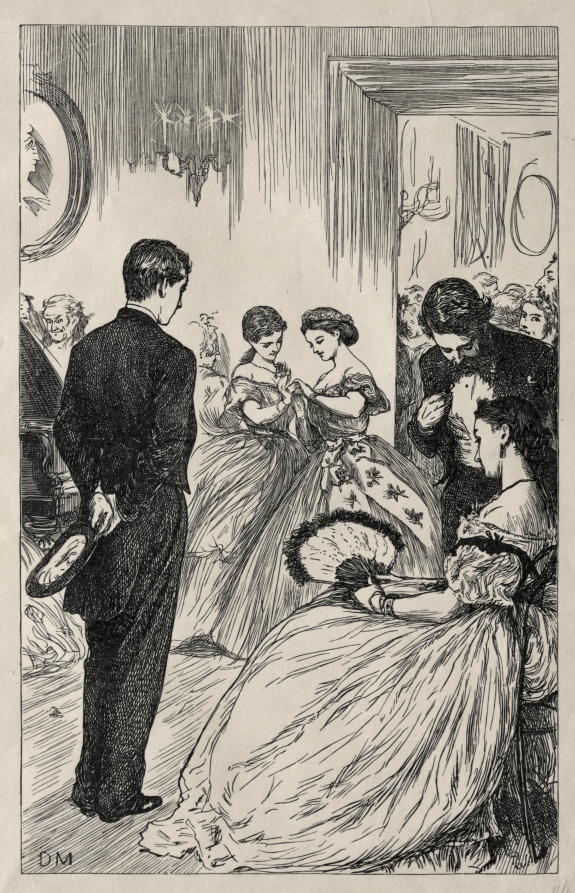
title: Coelebs in Search of a Mulready Envelope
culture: England, 19th century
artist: George Louis Palmella Busson Du Maurier (British, 1834–1896)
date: 1865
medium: wood engraving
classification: Print